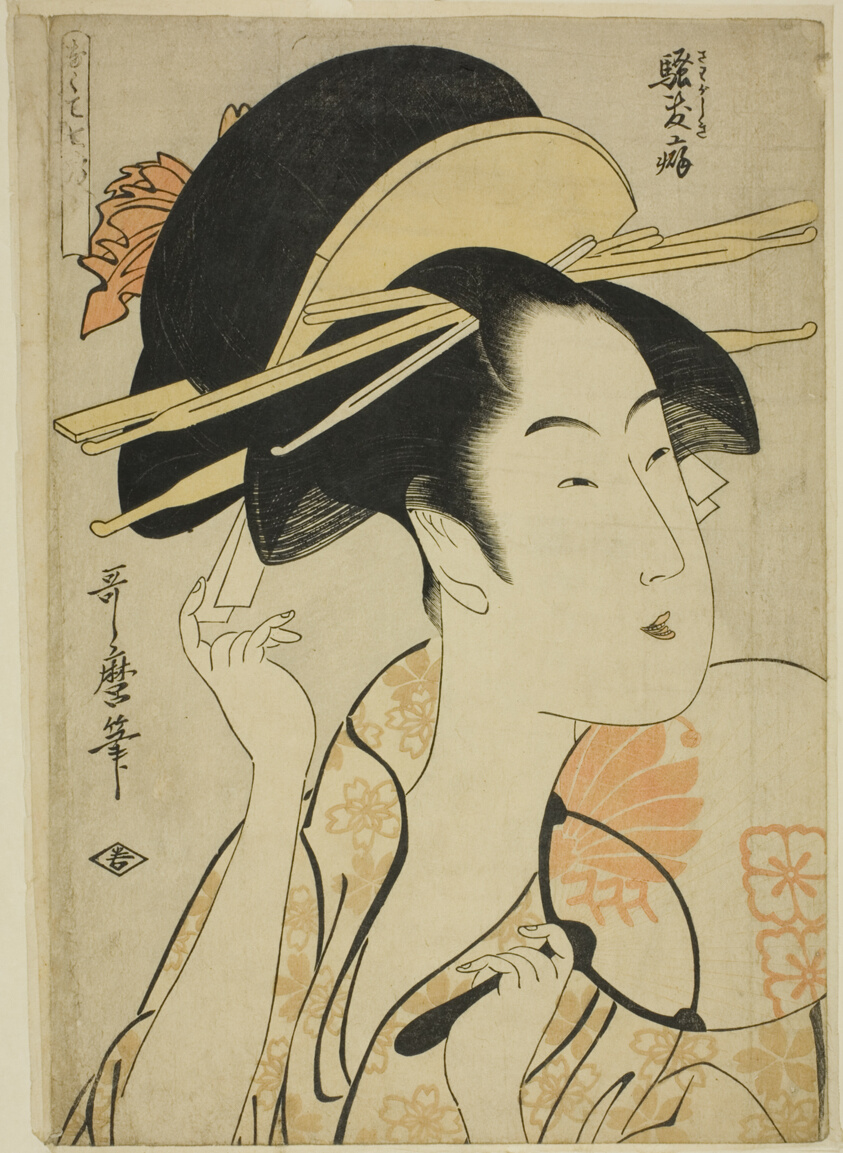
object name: Print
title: The Habit of Boisterousness (Sawagashiki kuse), from the series "Seven Bad Habits (Nakute nana kuse)"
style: Japanese (culture or style)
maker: Kitagawa Utamaro 喜多川 歌麿; Japanese, 1753 (?)-1806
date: c. 1797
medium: Color woodblock print; oban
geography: Japan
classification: woodblock print; print; asian art